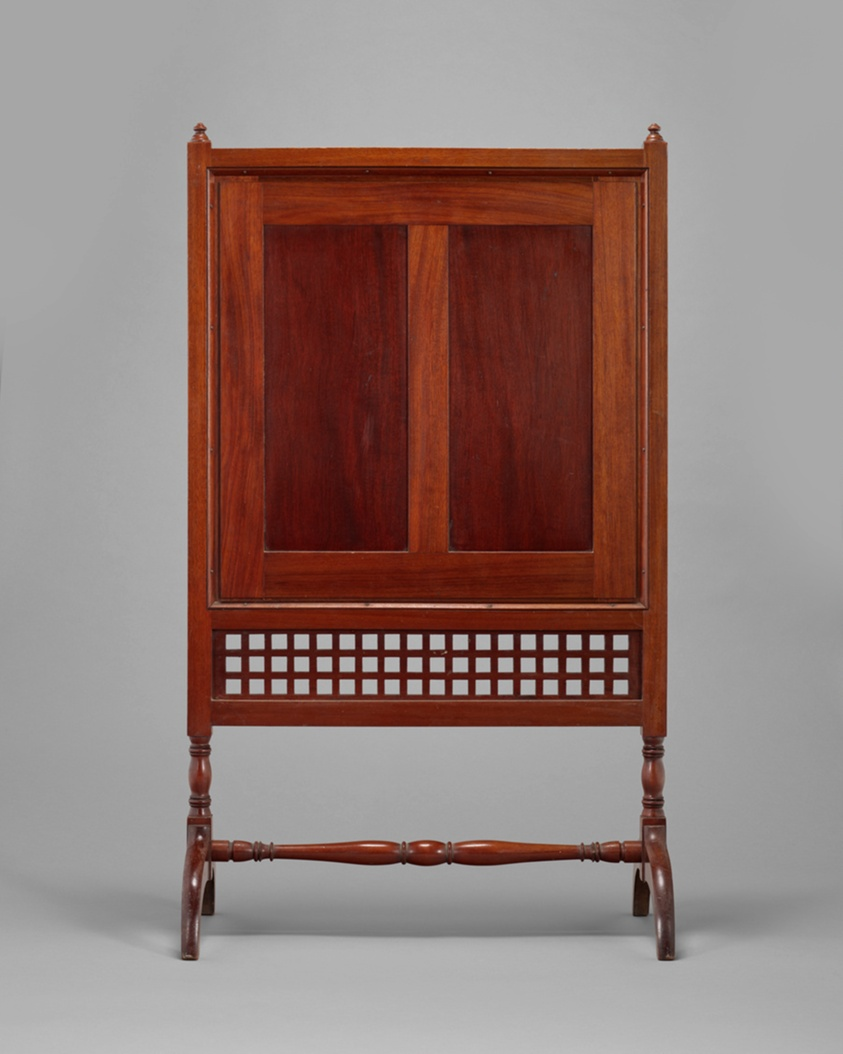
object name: Coverings and Hangings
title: Flowerpot Fire Screen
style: Arts and Crafts Movement, 19th century, british, British Arts and Crafts Movement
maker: Designed by William Morris (English, 1834-1896); Produced by Morris & Co., London (English, 1875–1940)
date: Design early 1880s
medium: Wood, cotton or linen ground, silk floss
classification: embroidery; fire screen (furniture); textile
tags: flowers, vase, foliage